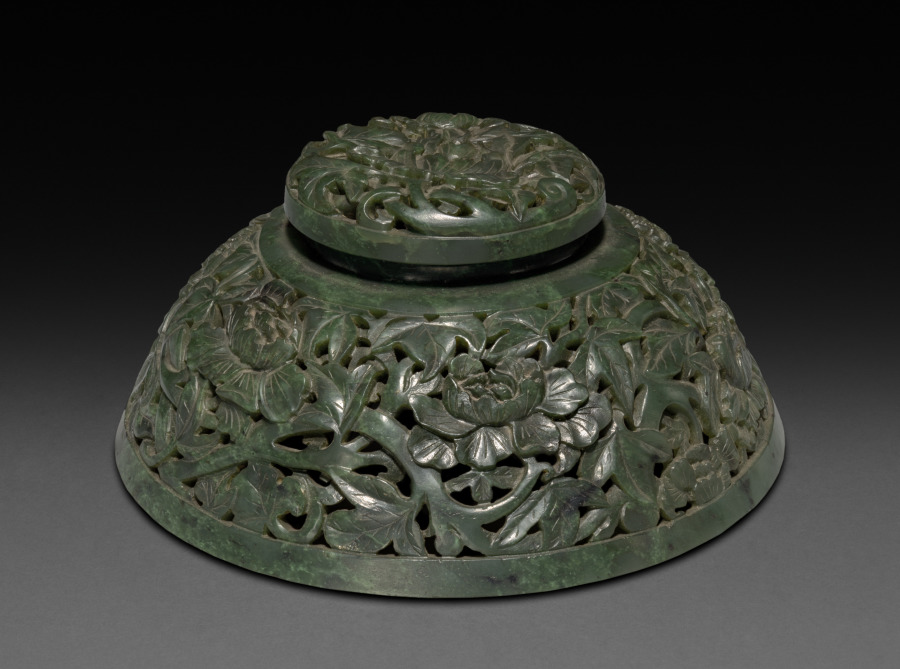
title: Fragrance Container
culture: China, Qing dynasty (1644–1911), Qianlong reign (1736–95)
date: 1736–95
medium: jade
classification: Jade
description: In the Qing (1644–1911) dynasty, luxury items became more affordable to larger parts of the society, including women, merchants, and literati in non-official positions. Imperial patronage and a growing urban population encouraged consumption of luxury goods and local craftmanship. This spinach-green jade incense burner has pierced floral designs and four pierced floral handles. It illustrates the superb carving skills and the creative mind of its accomplished creator, who sought clients on a competitive market.